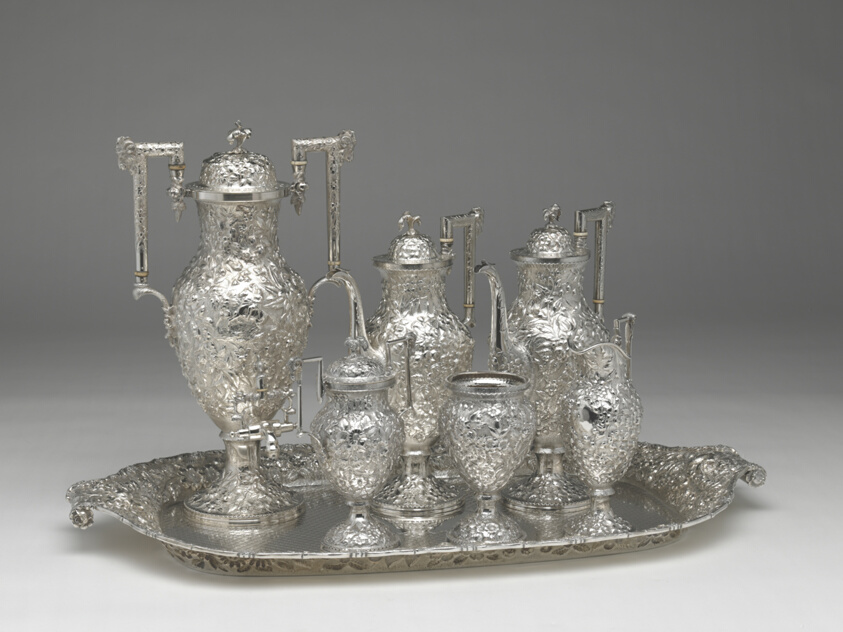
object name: Metalwork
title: Tea and Coffee Service with Tray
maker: Andrew Ellicott Warner; American, 1786–1870; Andrew Ellicott Warner Jr.; American, 1813–1896; Schofield Co. Inc.; American, active 1903–65; Baltimore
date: 1850–1900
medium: Silver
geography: Baltimore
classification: tea service; silver; american decorative arts; american arts; decorative arts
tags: dining, drinking